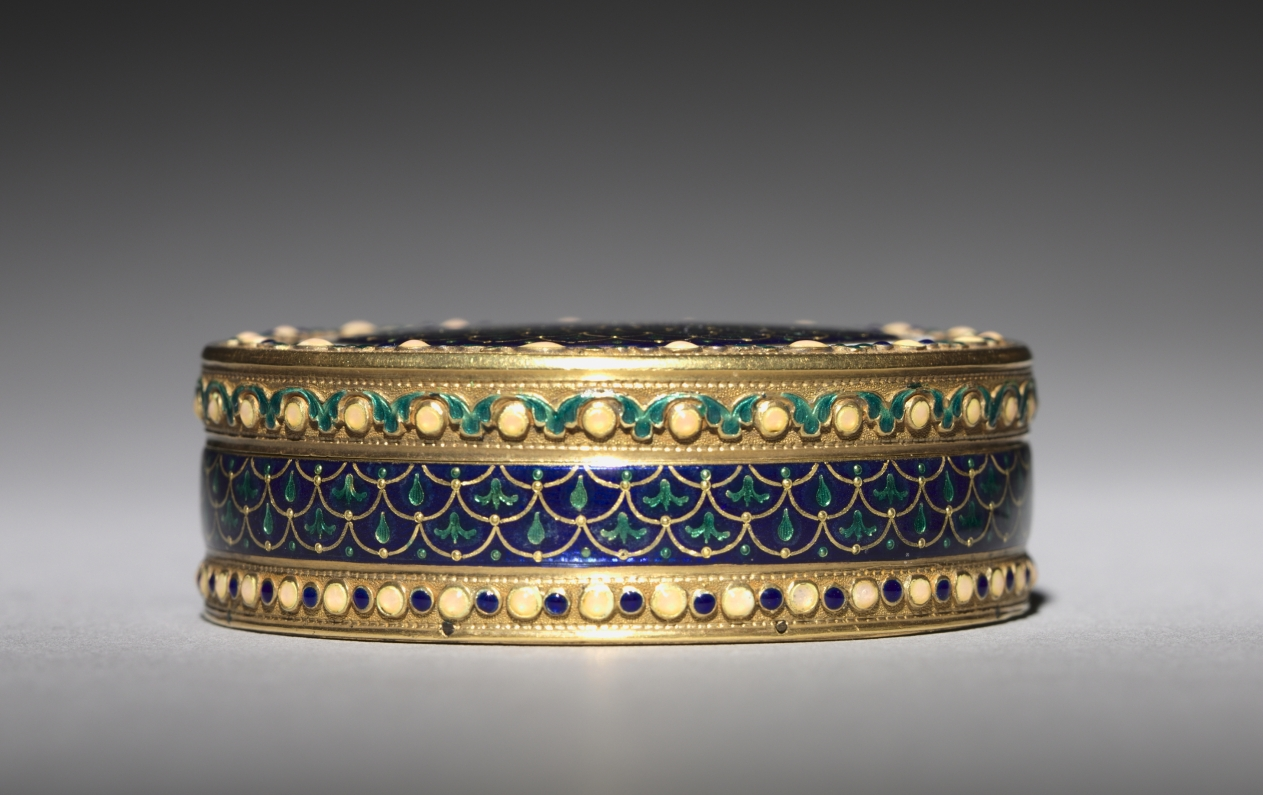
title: Powder Box (Poudrier)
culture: France, 18th century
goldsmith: Jean-Joseph Barrière (French)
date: 1779–80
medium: enamel on gold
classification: Miscellaneous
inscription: [Maker's mark of Jean-Joseph Barrière, master goldsmith in 1763, bottom; exterior wall; inside cover]: "JJB"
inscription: [Warden's mark for Paris, 1779-1780, exterior wall]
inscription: [Discharge mark of Henry Clavel I, Paris, 1780-1782, exterior wall]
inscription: [Counter-mark of Henry Clavel I and Jean-Francois Kalendrin, Paris,1782-1789, exterior wall]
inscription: [Restricted warranty mark for gold, Paris, exterior wall]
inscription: [Three illegible marks, bottom]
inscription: [Three illegible marks, cover]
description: In the 1700s ornately enameled boxes became a popular accessory in the French court. These boxes often held powdered tobacco, called snuff. However, this box, which is unhinged, likely held powder, rouge, or face cream. Pageantry and performance were important aspects of social interaction during this period. The extravagant designs and associated functions of these boxes communicated social and political status.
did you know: Jean-Joseph Barrière received his designation of master goldsmith in 1763, a coveted title that required candidates to complete a lengthy apprenticeship followed by a test of skill.